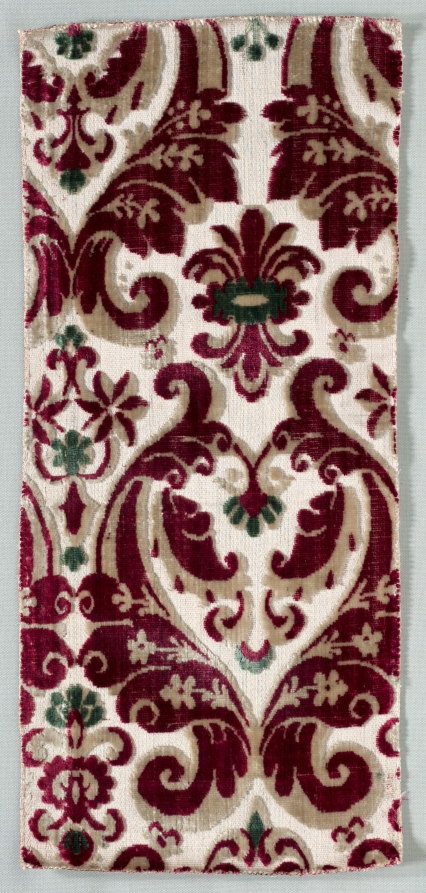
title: Velvet Fragment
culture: Italy, late 17th century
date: late 1600s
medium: velvet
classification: Velvet